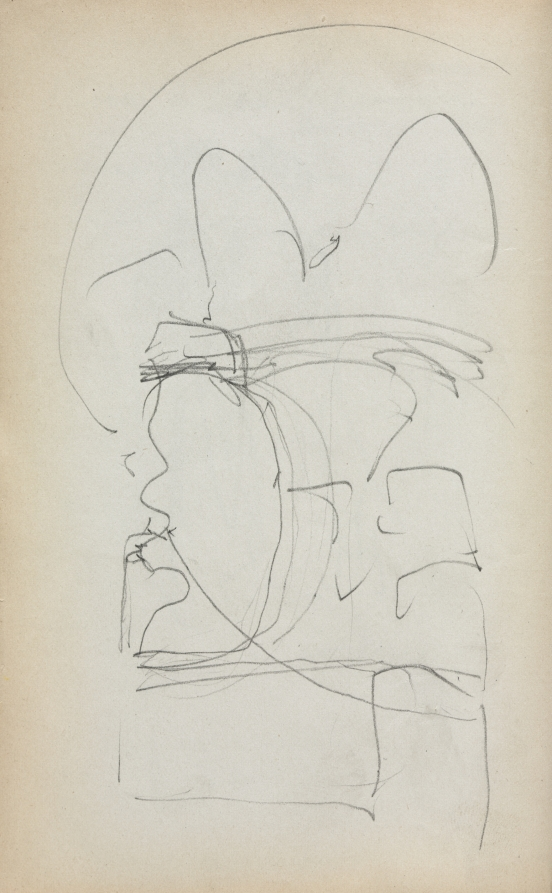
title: Italian Sketchbook: Abstract Sketch (page 5)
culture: America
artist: Maurice Prendergast (American, born Newfoundland [now Canada], 1858–1924)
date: 1898–1899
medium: pencil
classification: Bound Volume